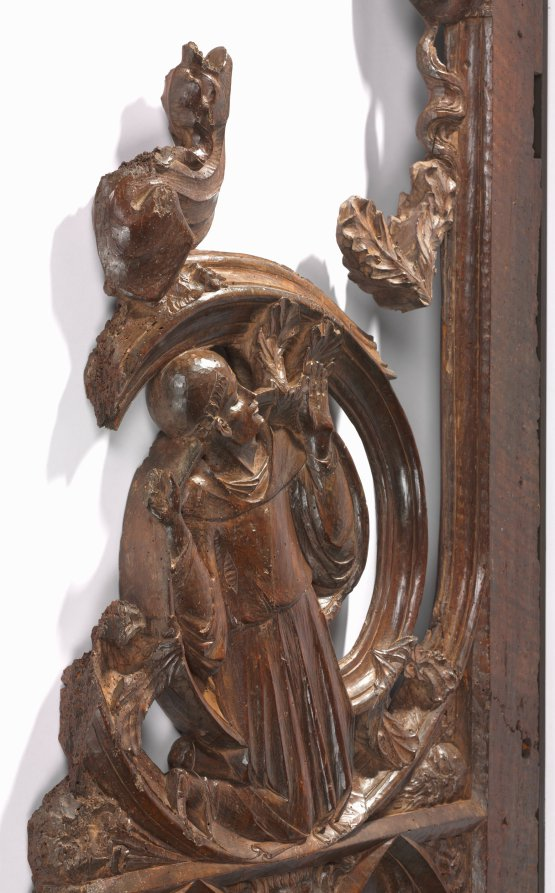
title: Panel from a Choir Stall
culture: Spain, Catalonia, Monastery of Pedralbes, 14th century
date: c. 1330–1340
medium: walnut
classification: Furniture and woodwork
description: The large panel shown here was probably the end panel of a stall that faced another across the choir of a Gothic church. The panel is carved with the figure of St. Francis of Assisi kneeling in prayer and receiving the stigmata. Two standing figures also appear on this panel: a nun at the left (perhaps St. Claire) and a female martyr at the right. Below is St. Michael and the dragon.